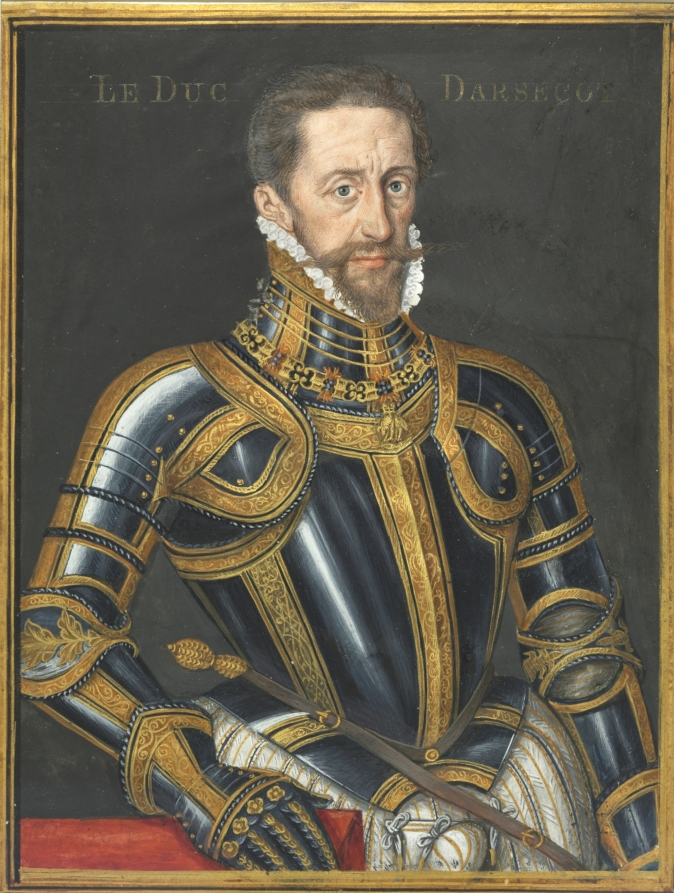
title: Portrait of Philippe de Croy, Duke of Aerschot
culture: Belgium, Flemish School, 19th century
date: 1800s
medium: watercolor on vellum in a later gilt-wood frame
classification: Portrait Miniature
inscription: inscribed: LE DUC / DARSECOT [annotated on reverse: LE DUC DARSCHOT]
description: Heir of an illustrious Flemish family and a member of the Order of the Golden Fleece, Philippe de Croy held the position of governor of Antwerp and governor-general of Flanders. As such, he repeatedly served the interests of the Habsburg emperor Charles V and King Philip II in the Spanish imperial armor. He is represented in this vellum miniature wearing the ceremonial parade armor befitting a great general. His blued, etched, and gilded armor is probably of Augsburg make, a center many of the Habsburgs favored for its production of deluxe armor.